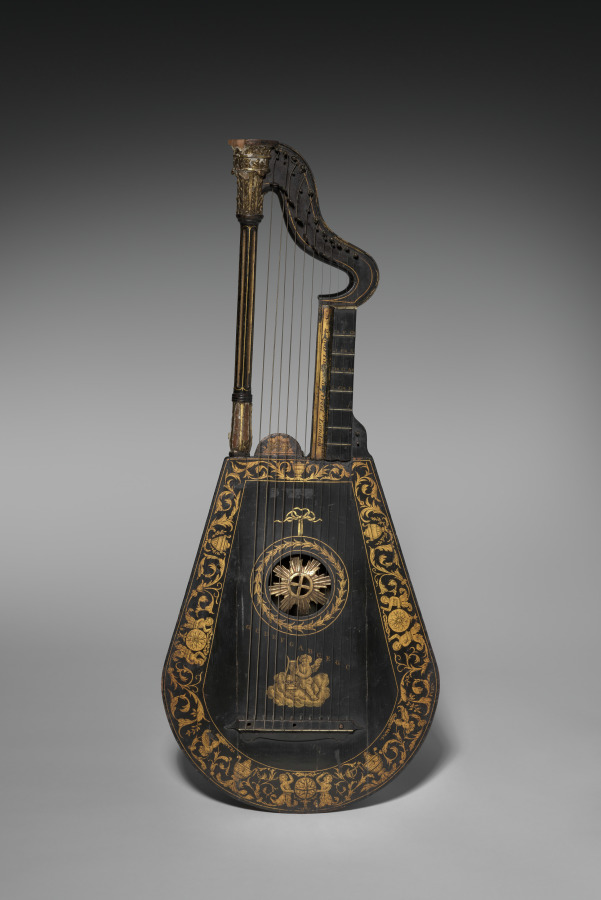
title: Harp-Lute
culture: England, London, 18th century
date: 1700s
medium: varnished wood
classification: Musical Instrument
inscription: the maker's name is illegible, but the number of the instrument is 14.